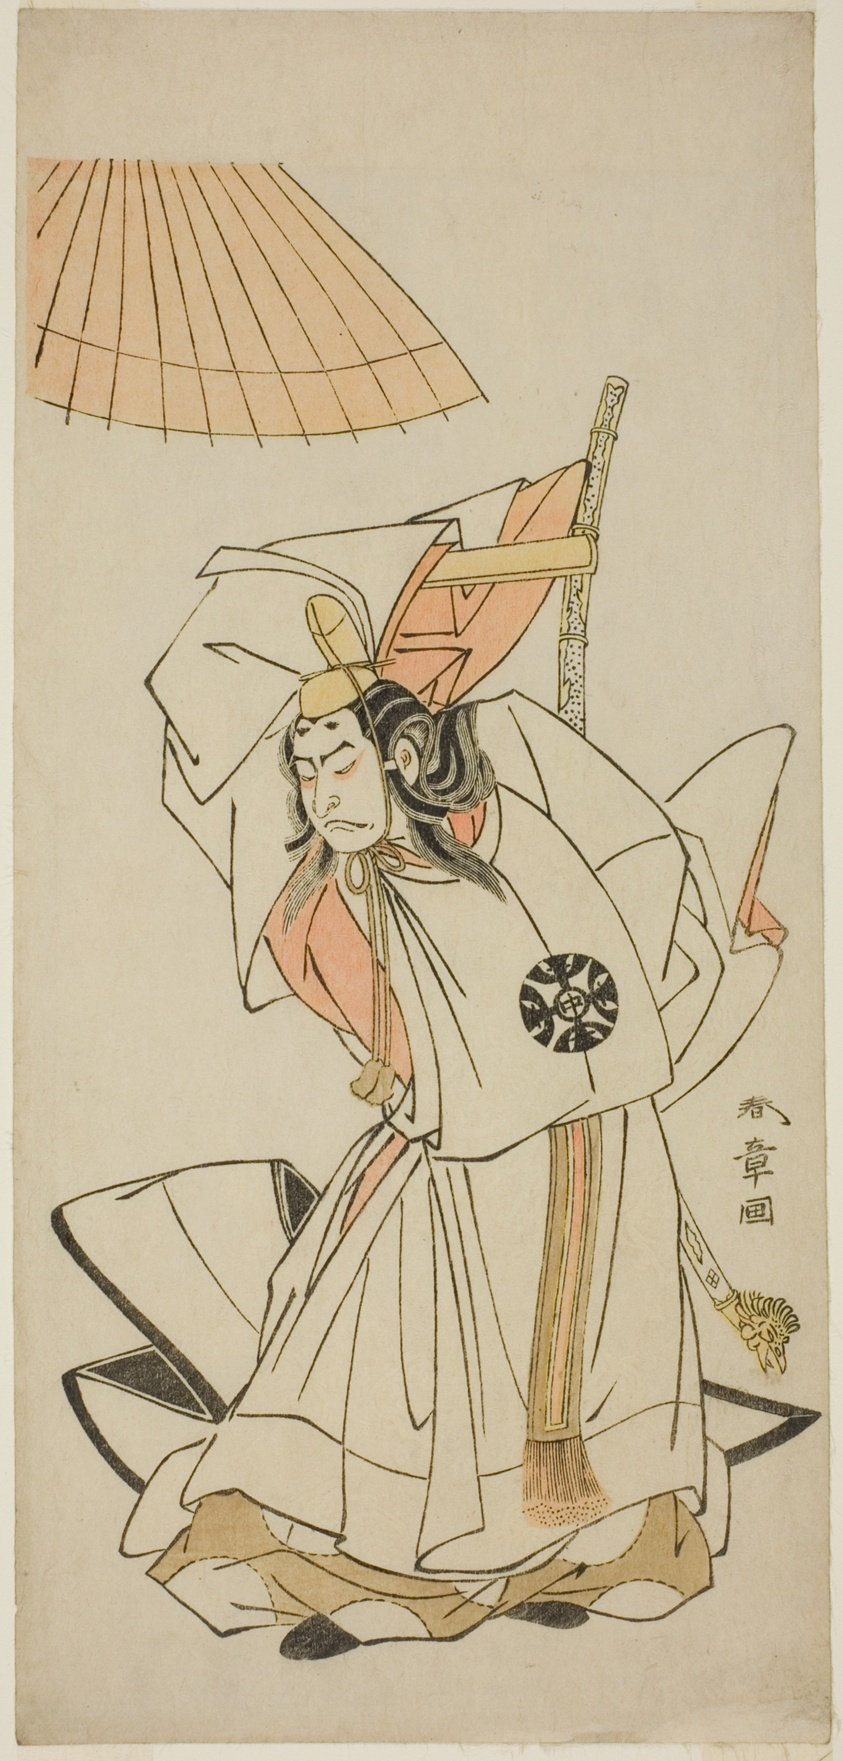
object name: Print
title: The Actor Nakamura Nakazo I as Prince Koreakira, Younger Brother of Emperor Go-Toba, in the Play Gohiiki Kanjincho (Your Favorite Play Kanjincho [The Subscription List]), Performed at the Nakamura Theater from the First Day of the Eleventh Month, 1773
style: Japanese (culture or style)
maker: Katsukawa Shunsho 勝川 春章; Japanese, 1726-1792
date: c. 1773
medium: Color woodblock print; hosoban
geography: Japan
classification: woodblock print; print; asian art